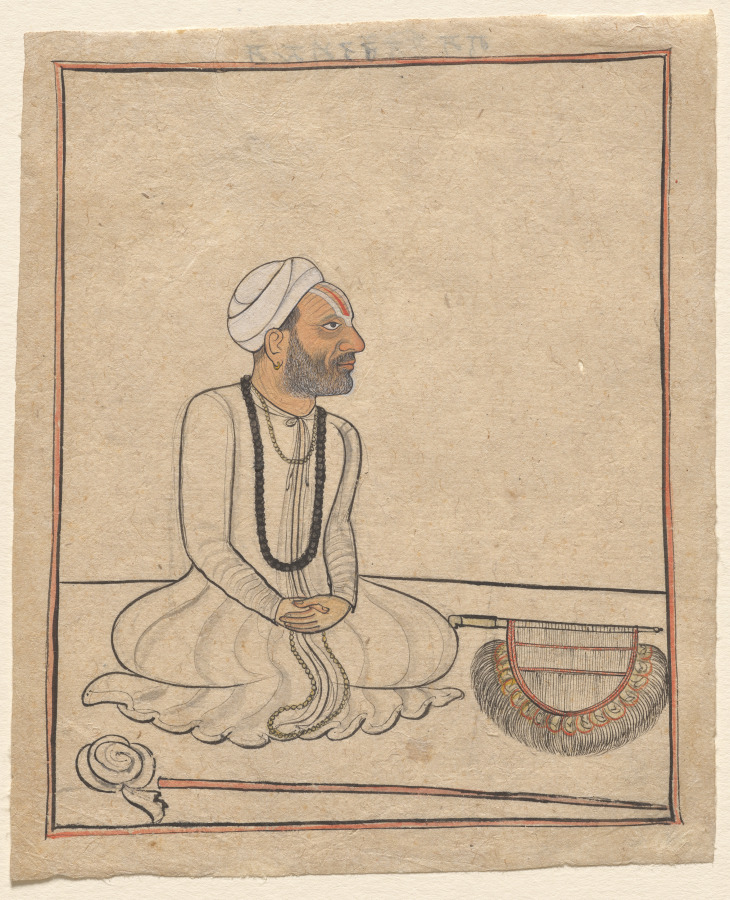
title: Gosain Narottam Das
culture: Northern India, Pahari kingdoms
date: c. 1720–30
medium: gum tempera and ink on paper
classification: Painting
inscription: Inscription in Takri on reverse: "Gusain Narottam Das" (Gosain Narottam Das)